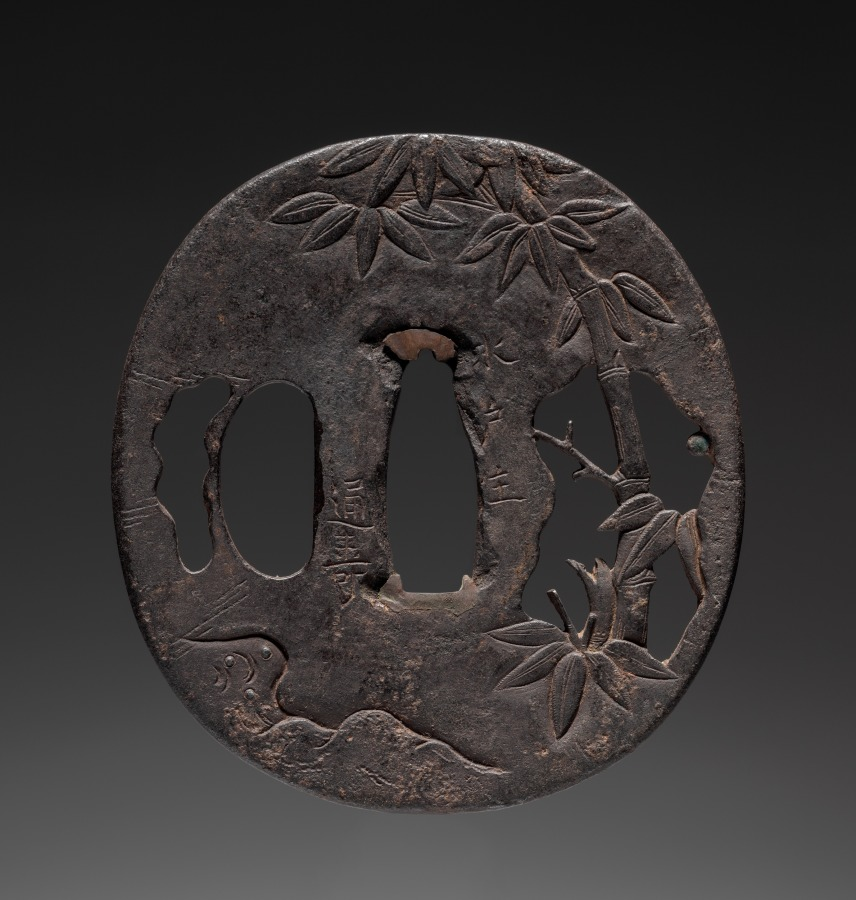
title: Sword Guard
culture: Japan, Edo period (1615–1868)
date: 1700–1768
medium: iron (Mito type)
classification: Arms and Armor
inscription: signed "Tsuju (Michinaga), residing at Mito."